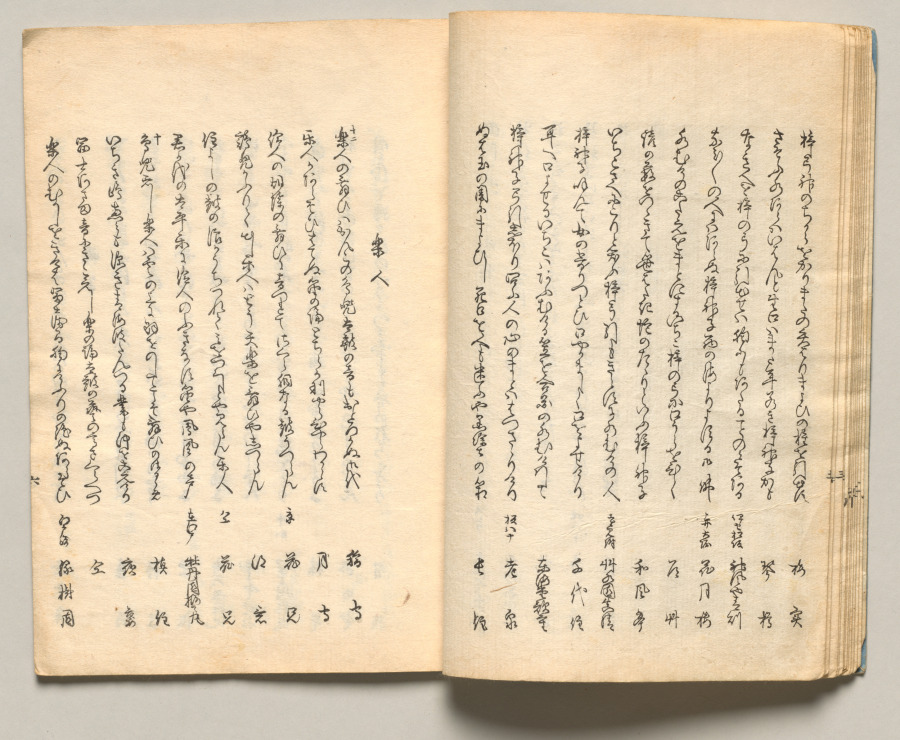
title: Spread Thirteen from Volume Three of People of Japan in Light Verse (Kyōka)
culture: Japan, Edo period (1615–1868)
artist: Utagawa Hiroshige (Japanese, 1797–1858)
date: 1857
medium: Woodblock-printed book; ink and color on paper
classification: Bound Volume